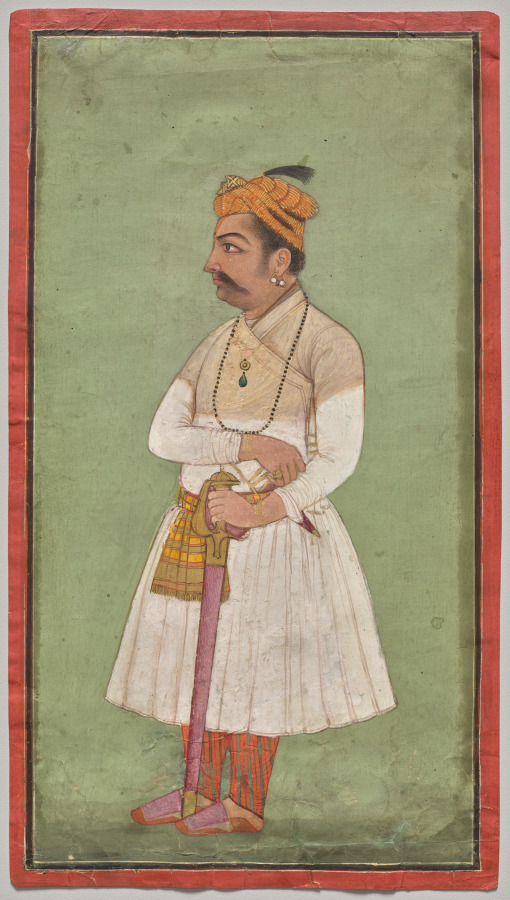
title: Raja Hari Sen of Mandi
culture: Northern India, Pahari kingdoms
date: c. 1650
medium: Gum tempera, ink, and gold on paper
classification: Painting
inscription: 111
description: In the portrait, the raja is depicted clad in a gheradar jama tied with a short-length pataka, a feature of Jahangir-era fashion. He stands confidently against a monochromatic fern green backdrop, with his left hand supporting his sword in a mauve sheath while his right hand reaches toward his dagger securely tucked in his belt.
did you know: Raja Hari Sen adorns a Jahangir-style turban which was out of imperial fashion at the time of portraiture